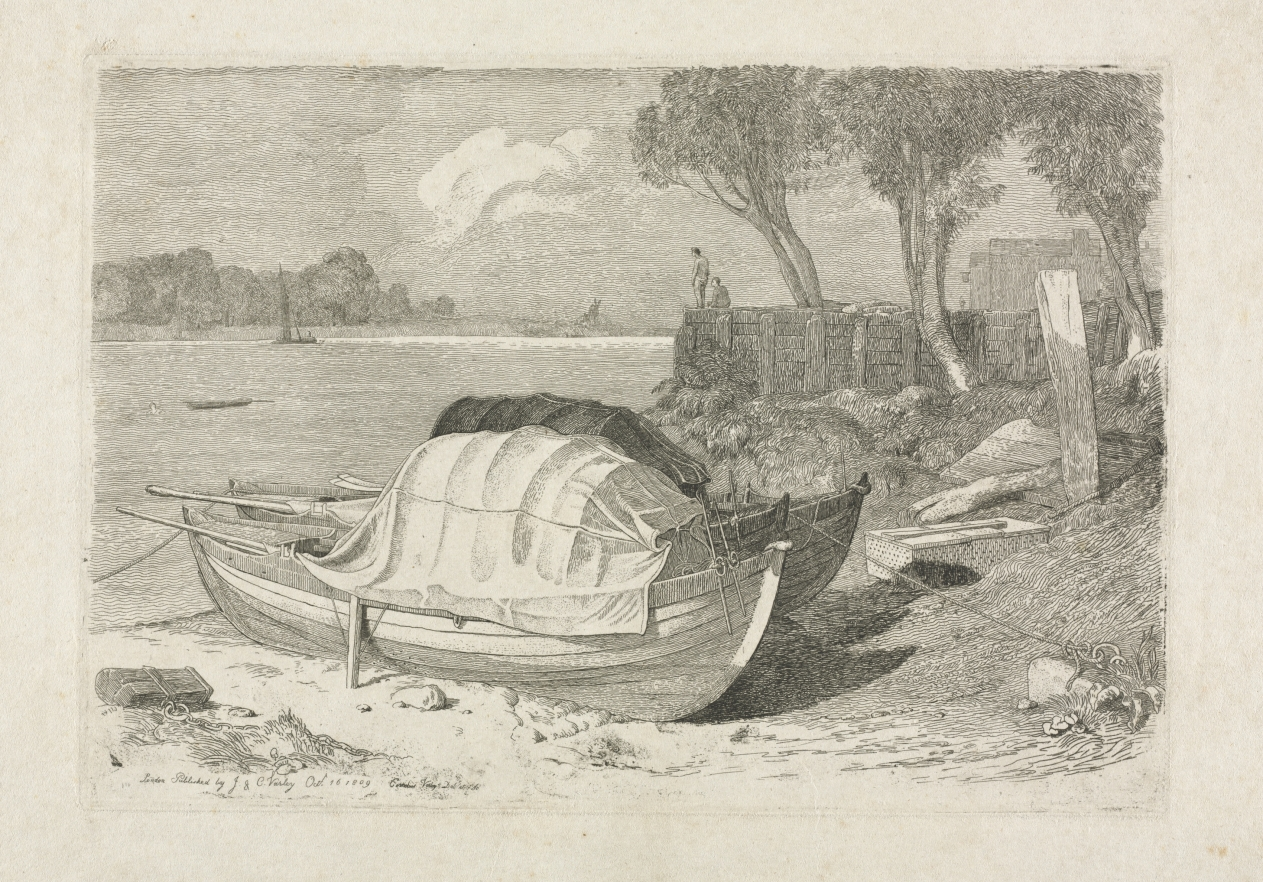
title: Two Beached Fishing Boats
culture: England, 19th century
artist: Cornelius Varley (British, 1781–1873)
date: 1809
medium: etching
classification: Print